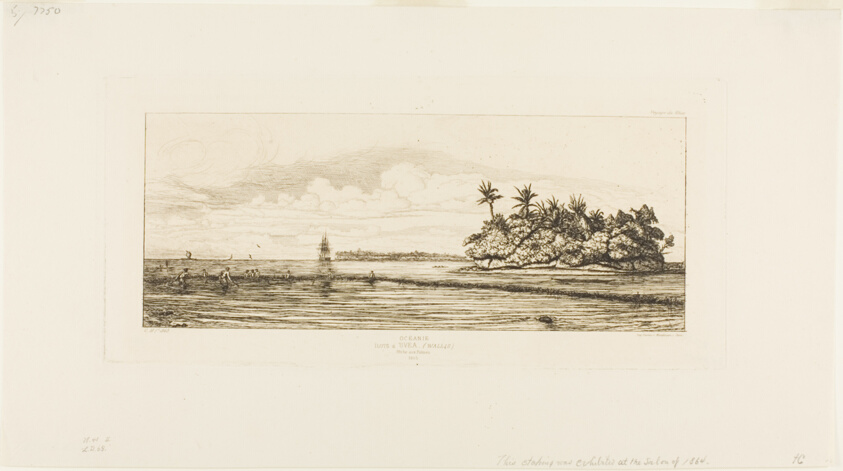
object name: Print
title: Oceania: Fishing, Near Islands with Palms in the Uea or Wallis Group, 1845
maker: Charles Meryon (French, 1821-1868); printed by Pierron (French, 19th century)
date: 1863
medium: Etching with drypoint on ivory laid paper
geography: France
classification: etching; print; prints and drawing